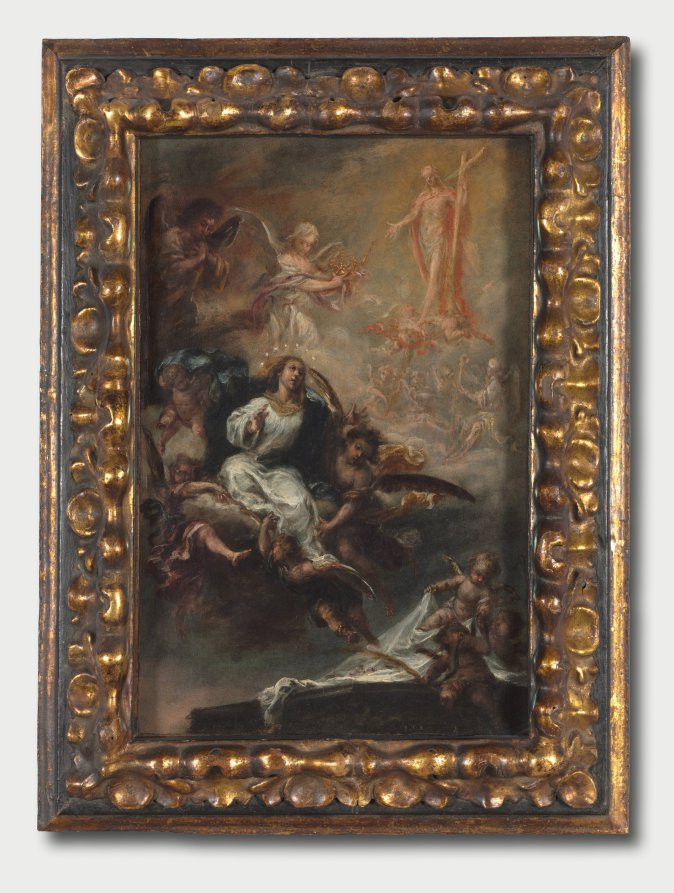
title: Study for "The Assumption of the Virgin" for San Augustín, Seville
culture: Spain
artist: Juan de Valdés Leal (Spanish, 1622–1690)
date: c. 1670–72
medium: oil on wood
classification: Painting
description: This painting is a sketch for a large altarpiece. The rough, flickering surface, the unusually sharp contrast of hot and cool hues, and the compression of space all characterize the artist’s intense spirituality and unique technique. While often held apart from the sweetness and grace of Murillo (also represented in the collection), his contemporary in Seville, the two artists worked closely together on commissions and often presented their work side by side, speaking to the stylistic diversity and religious complexity preferred by patrons in Seville during the late 1600s.